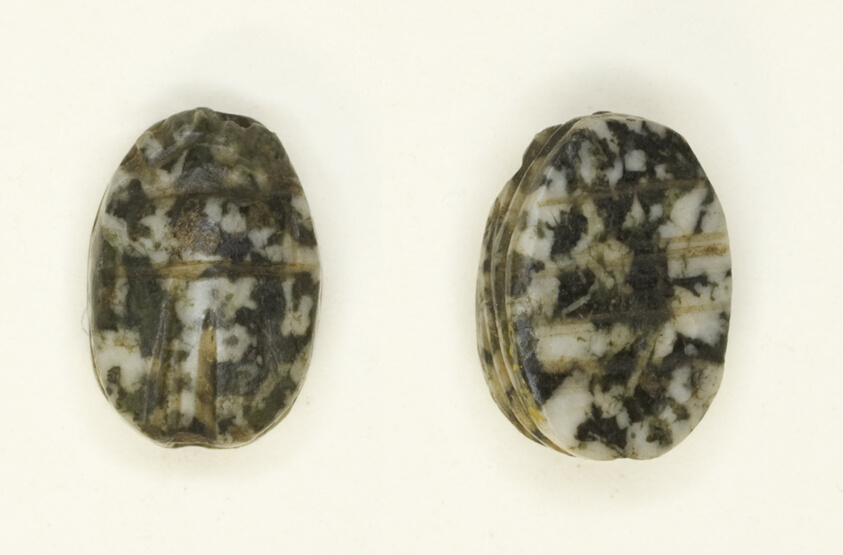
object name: Costume and Accessories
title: Scarab: Linear Motifs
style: egyptian, first intermediate period, ancient, middle kingdom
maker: Egyptian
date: First Intermediate Period–Early Middle Kingdom, Dynasties 9–12 (about 2160–1773 BCE)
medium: Stone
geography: Egypt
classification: scarab; stone; ancient art; costume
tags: scarab beetle